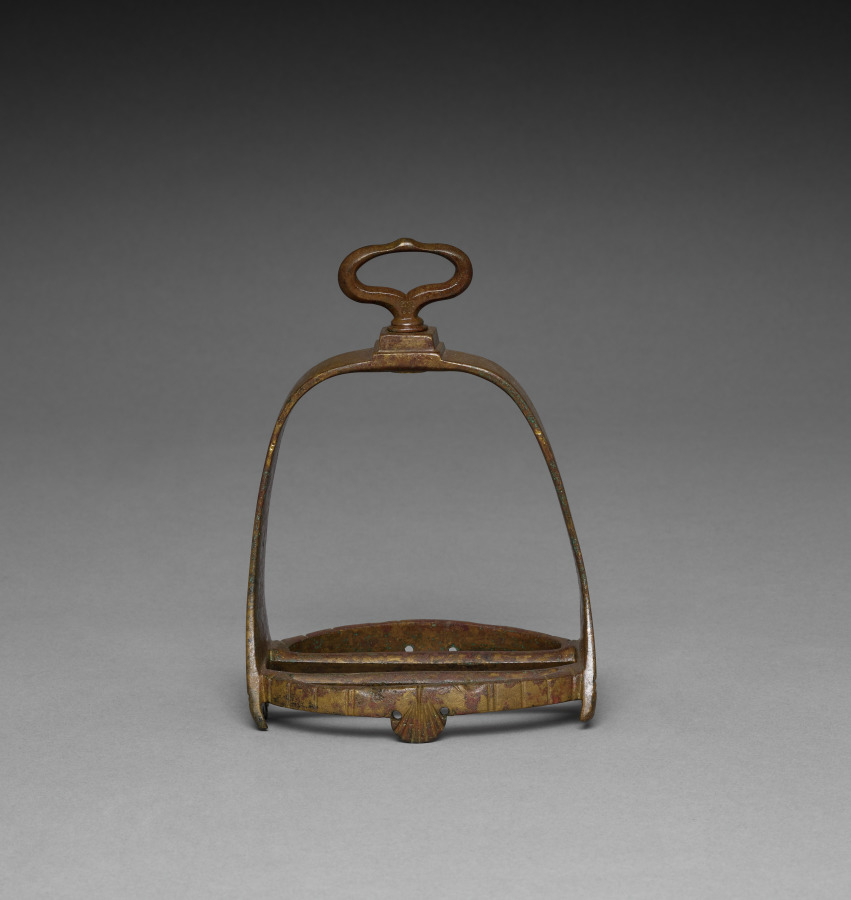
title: Stirrup (2 of 2)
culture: England (?), 17th century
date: 1600s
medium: brass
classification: Arms and Armor